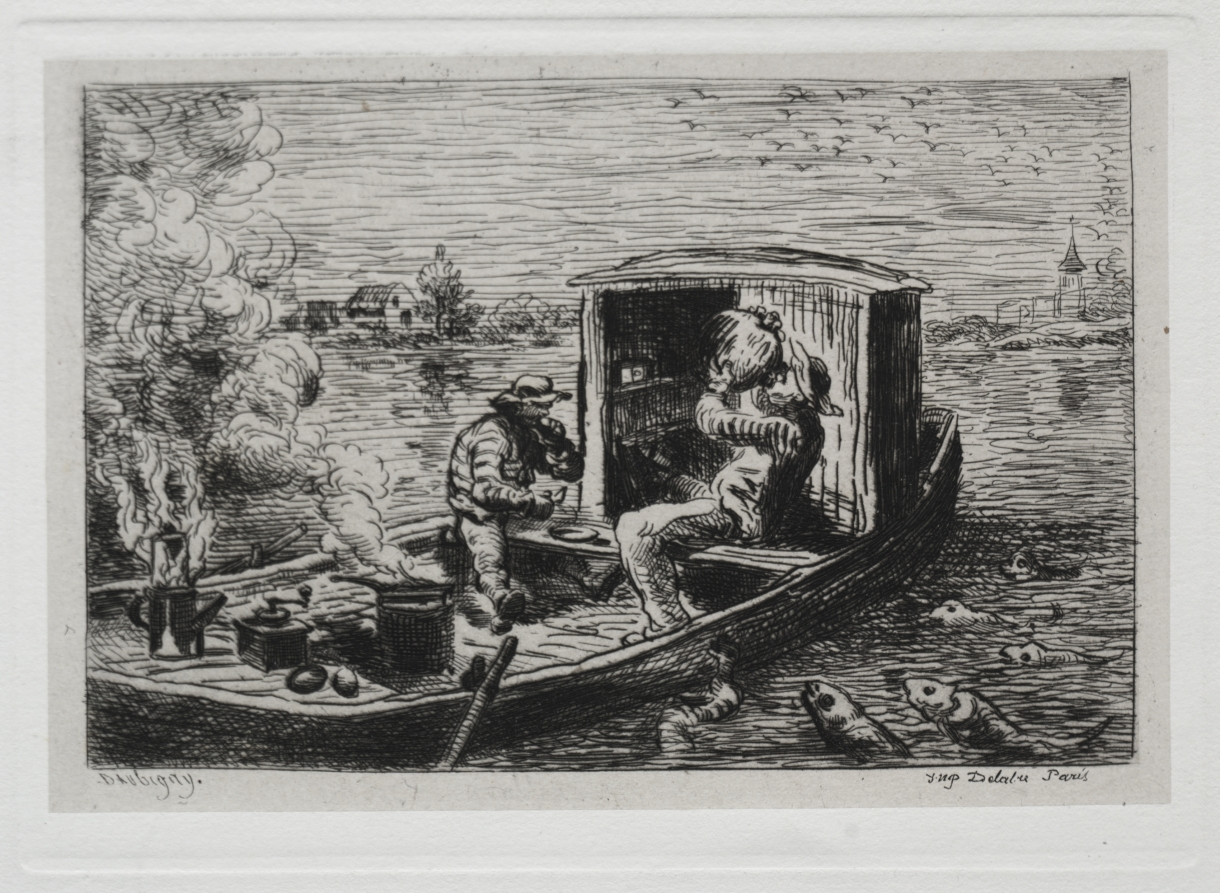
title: The Boat Trip: Guzzling or Lunch on the Boat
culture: France, 19th century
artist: Charles François Daubigny (French, 1817–1878)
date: 1861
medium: etching with chine collé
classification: Portfolio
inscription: lower left corner, in graphite: L. D. 104